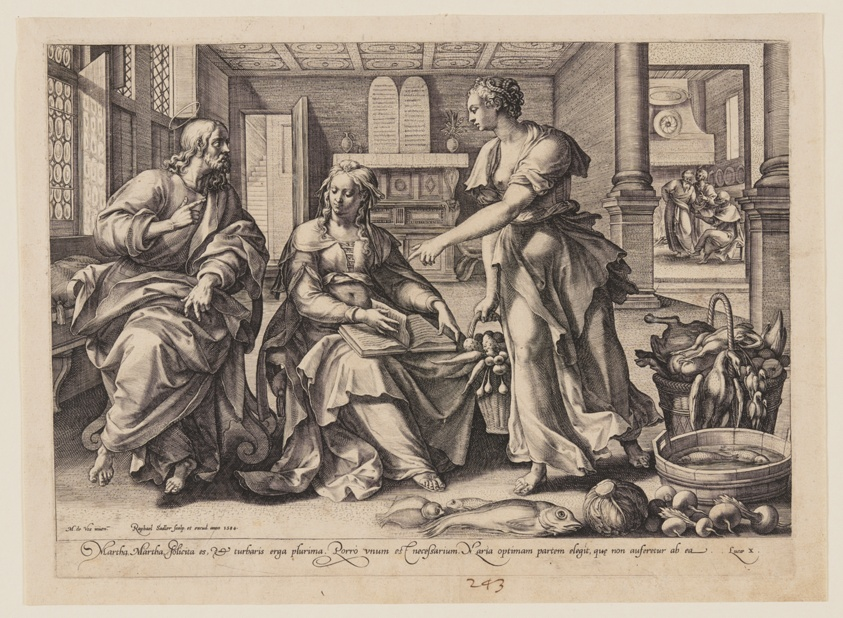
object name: Print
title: Christ in the House of Martha and Mary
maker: Raphael Sadeler I (Flemish, 1560/61–1628/32); after Maarten de Vos (Flemish, 1532–1603)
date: 1584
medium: Engraving on ivory laid paper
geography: Flanders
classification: engraving; paper; print; prints and drawing